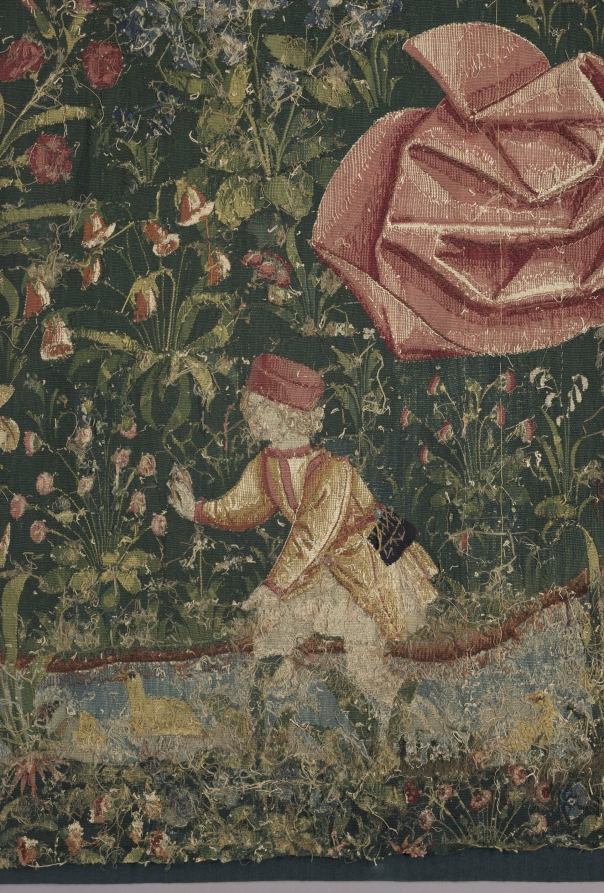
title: The Triumph of Eternity (from Chateau de Chaumont set)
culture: France, Lyon(?), early 16th century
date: 1512–15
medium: silk and wool; tapestry weave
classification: Tapestry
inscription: French verse in Gothic letters translates as follows: "Nothing triumphs by right authority, Unless it be conducted by Eternity. Nothing is permanent beneath the firmament, But above us triumphs Eternity."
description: The Triumph of Eternity is represented by the Coronation of the Virgin. Dressed in crimson velvet with an opulent brocaded velvet shawl, the Virgin is seated in the center as two angels hold a crown over her head. Five musical angels surround her playing an organ, recorder, straight cornetto, harp, and lute, while another sings from an open music book. The scenes in the set display a conservative style in which the figures are placed in shallow landscapes, thereby ignoring pictorial innovations for depicting space and mass. The verse in Old French at the top states: Nothing triumphing by due authority Remains permanent and durable. Nothing is permanent under the heavens, But above, eternity triumphs.